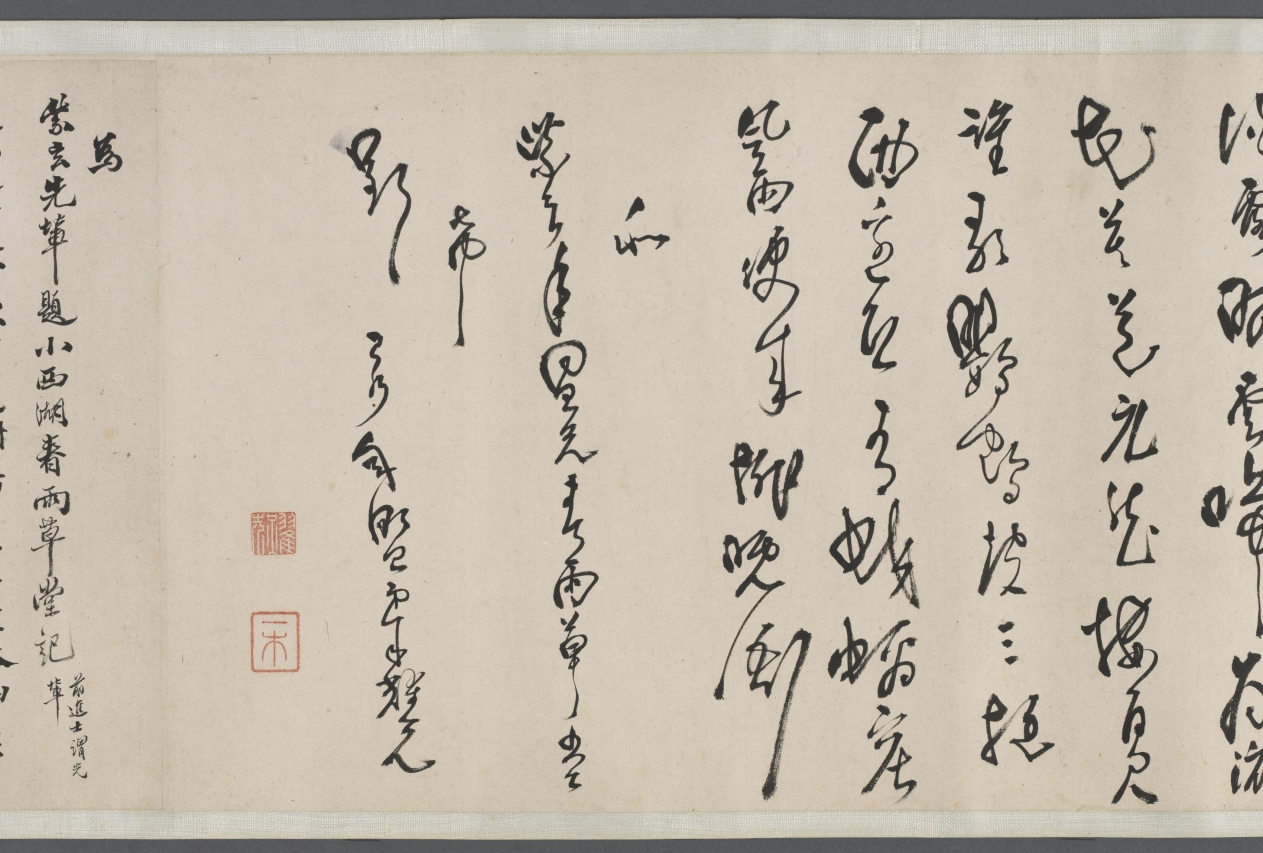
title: Spring Rain Thatched Hut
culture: China, Qing dynasty (1644-1911)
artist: Wang Jianzhang (Chinese, active 1621–1662)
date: 1650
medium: handscroll, ink on paper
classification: Drawing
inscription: Title by Wu Zhiying 吳芝瑛 (1868–1933), dated 1910.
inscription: 春雨草堂圖。庚寅仲春，為紫玄社兄畫於若耶溪上。 仲初王建章。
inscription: 12 colophons by Gong Weiliu’s 宮偉鏐 (1611–1680) contemporaries: Fang Gongqian 方拱乾 (1596–1667, jinshi of 1628); Jiang Cai 姜埰 (1607–1673); Liang Yizhang 梁以樟 (1608–1665); Du Shaokai 杜紹凱 (also named Du Jie 杜岕, 1617–after 1689), dated 1648; Zhao Kaixin 趙開心 (d. 1663), dated 1647; Zhao Erbian 趙而忭 (d. 1658); Yu Yaoguang 余耀光, dated 1649; Yao Quan 姚佺, dated 1648; Chen Taisun 陳台孫 (b. 1611, jinshi of 1640); (Monk) Shao 韶; Du Zhujin 杜祝進; and Tang Shi 唐時.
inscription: 此研田莊居士王建章為先太史紫元公所作春雨草堂圖也。居士字仲初，明崇禎間人，與先太史及惲香山相友善。喜畫佛像，自謂不讓李公麟。山水祖述董源，筆力雄健，有不可羈勒之概。香山稱其墨有五采，非世人所知。然性廉重，非同志不輕落筆，人得其寸圖尺縑，必相與忻賞，如獲蜼彝兕敦，非人世間物也！見先太史筆記，此圖寫雨景，而氣韻生動，勃勃於不能止。每一展覽，覺滿紙雲烟，墨瀋猶濕，如寫吾先人胸中未盡之邱壑也。圖後題詠，多一時名手，想見文采風流之盛。迄今二百餘年，舊德先疇，遺風未沫。吾子孫其永寶之，如與吾先人接謦咳於一堂，為感思之助，其敢作圖畫觀乎！同時香山亦有圖佚去己久，不知異日能為延津之合否。壬申長夏本昂重裝敬識。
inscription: Collectors' seals including: Gong Ben'ang 宮本昂 (1821–1874); Lian Qian 廉泉 (1868–1932); Wu Zhiying 吳芝瑛 (1868–1933)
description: With its striking simplicity, this painting captures the pure serenity of a private garden in the moist atmosphere of a spring morning on a small river. Painted in the style of Ni Zan, Wang Jianzhang dedicated this work to his patron-friend Gong Weiliu (1611-1680). Gong retired from government service after the fall of the Ming dynasty and constructed a garden-retreat at his native home in Taizhou, Jiangsu province. He invited scholars and poets from his literary society to contribute writings of his estate, which are here mounted together with the painting in this scroll.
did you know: Gong Weiliu, the owner of the estate portrayed here, had received his prestigious jinshi degree in 1643, but his official career was thwarted by the collapse of the Ming dynasty the following year.